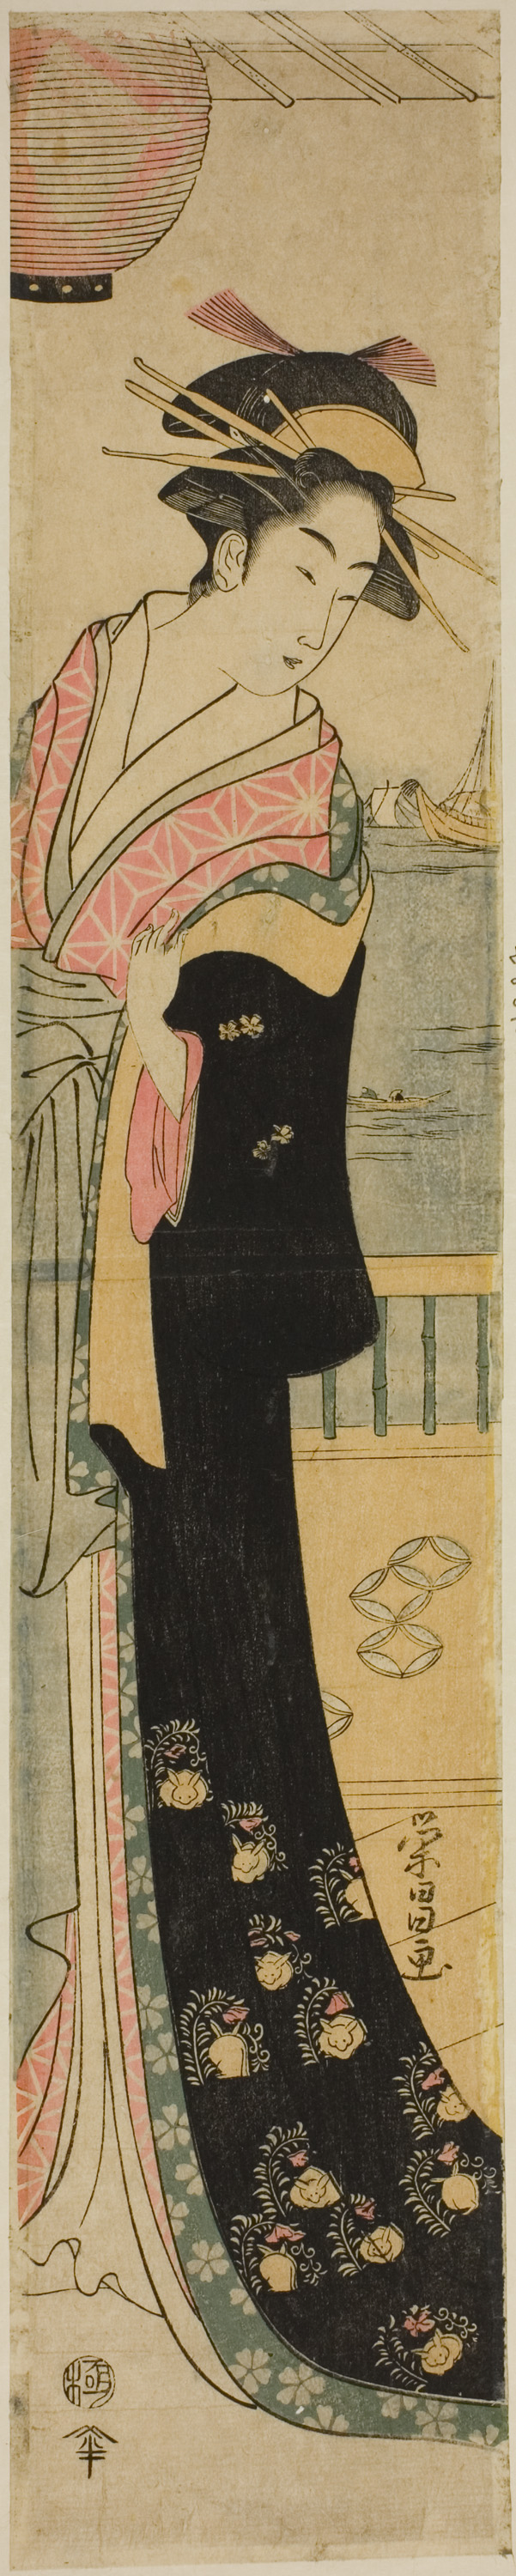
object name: Print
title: Women Standing on Veranda by a River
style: Japanese (culture or style)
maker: Chokosai Eisho (Japanese, active 1780-1800)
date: c. 1780/1800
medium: Color woodblock print; hashira-e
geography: Japan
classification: woodblock print; print; asian art